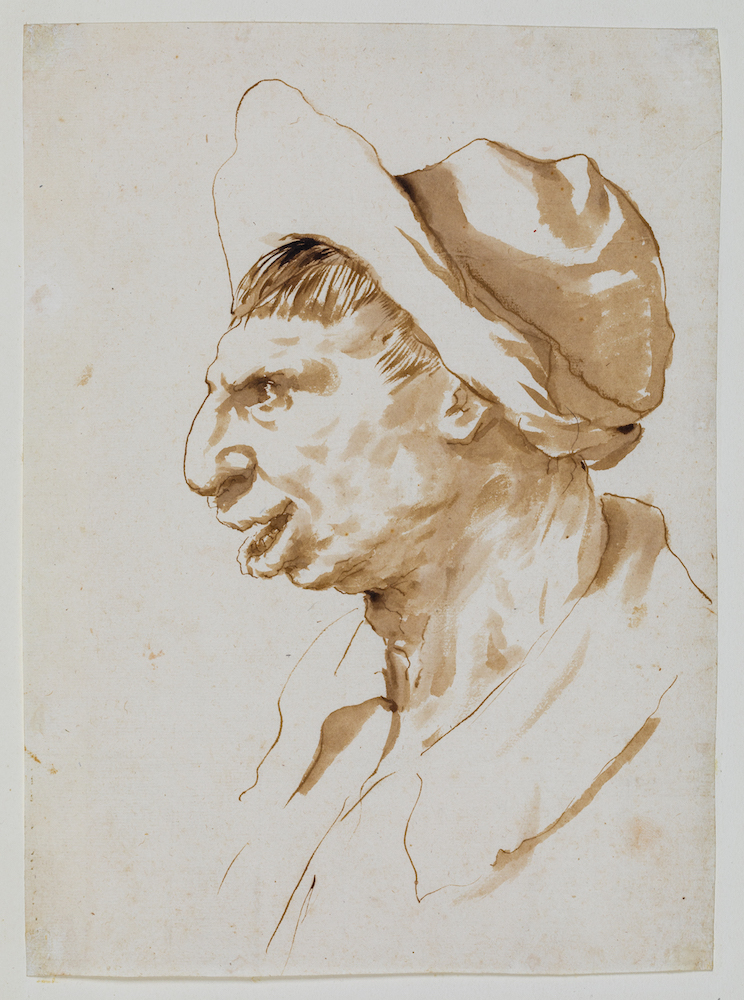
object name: Drawing and Watercolor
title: Head of a Peasant in Profile to the Left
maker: Guercino (Italian, 1591-1666)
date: c. mid–1630s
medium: Pen and brown ink and brush and brown wash on cream laid paper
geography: Italy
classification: drawings (visual works); brush and wash; pen and ink drawings; paper; prints and drawing